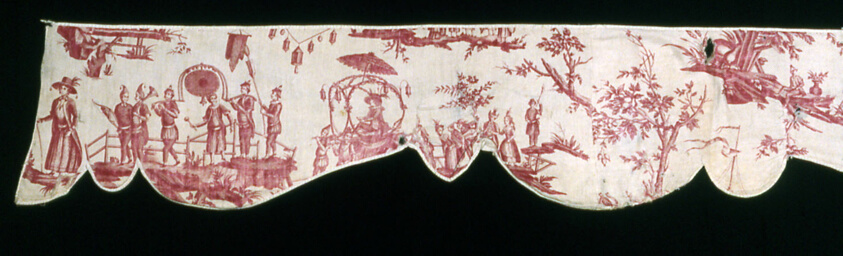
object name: Textile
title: Panurge dans l'île des lanternes (Panurge on the Isle of Lanterns) (Furnishing Fabric)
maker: Manufactured by Petitpierre et Cie. (French, 1760-1791); France, Nantes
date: 1785/90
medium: Cotton, plain weave; copperplate printed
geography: Nantes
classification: textile; weaving - printed; furnishing textile